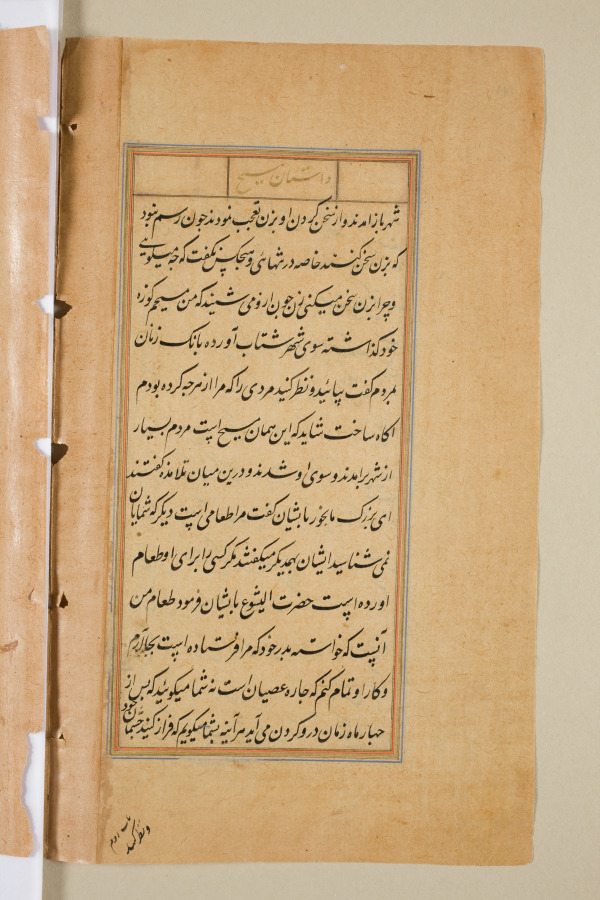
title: Text page from a Mirror of Holiness (Mir’at al-quds) of Father Jerome Xavier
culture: Mughal India, Allahabad, made for Prince Salim (1569–1627)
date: 1602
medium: Ink and gold on paper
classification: Manuscript